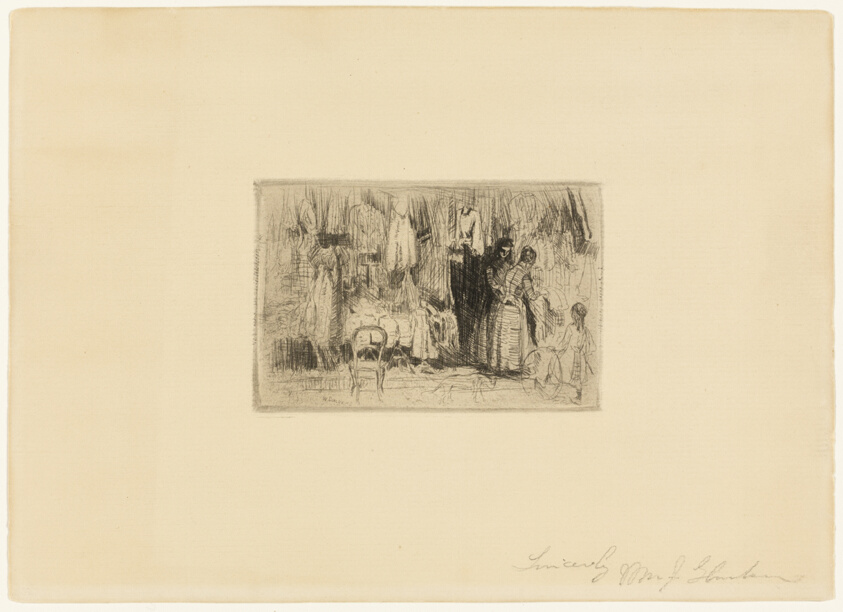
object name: Print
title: At the Dressmaker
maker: William James Glackens (American, 1870-1938)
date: 1895–1896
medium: Etching on cream laid paper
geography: United States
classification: etching; print; prints and drawing